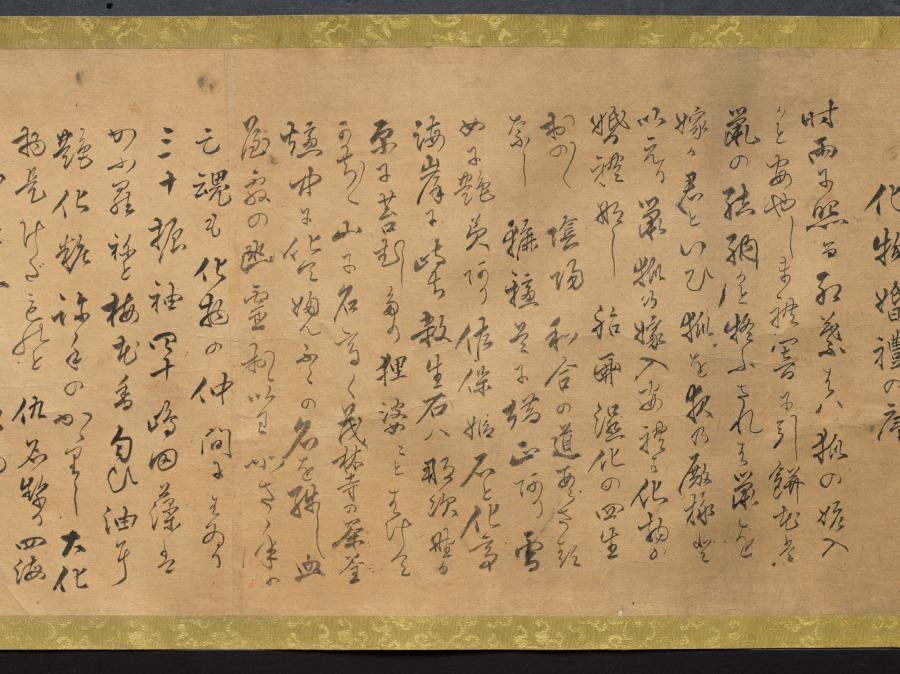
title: An Illustrated Marriage of Apparitions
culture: Japan, Edo period (1615–1868)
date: mid-1800s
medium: handscroll; ink and color on paper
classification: Painting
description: The matchmaking, engagement, wedding, and birth of the first child of two apparitions, or bakemono, literally "things that change," are illustrated in this whimsical, humorous handscroll. Japanese folklore abounds with such strange creatures, most famously represented in handscrolls featuring a procession of 100 supernatural monsters. Aside from a textual preface and cartouches indicating the content of the scenes, the tale is told visually. The artist and whereabouts of the original handscroll are unknown, but a number of other 19th-century copies by amateur painters exist in Japanese collections, attesting to its broad appeal.